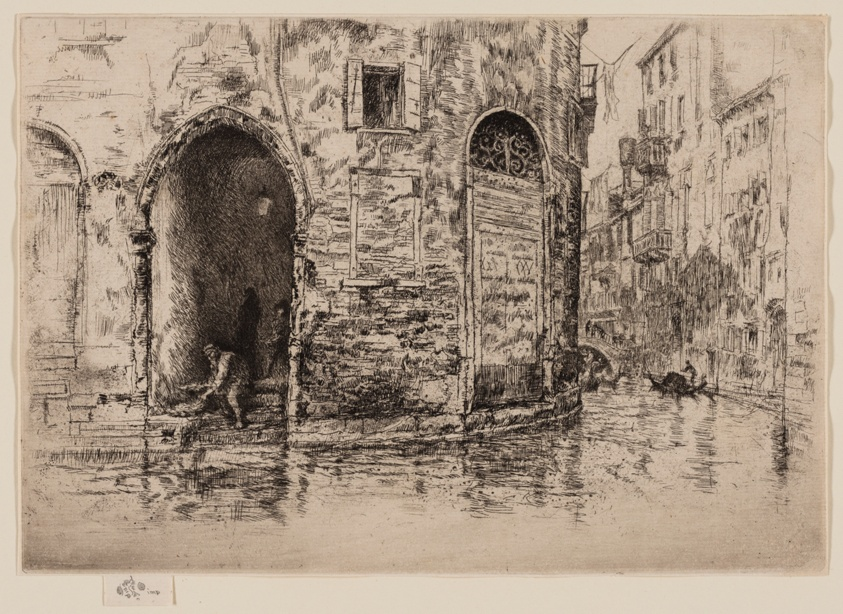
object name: Print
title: The Two Doorways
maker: James McNeill Whistler (American, 1834-1903)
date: 1879/80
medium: Etching with foul biting in black ink on ivory laid paper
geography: United States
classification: etching; print; prints and drawing; foul biting; paper